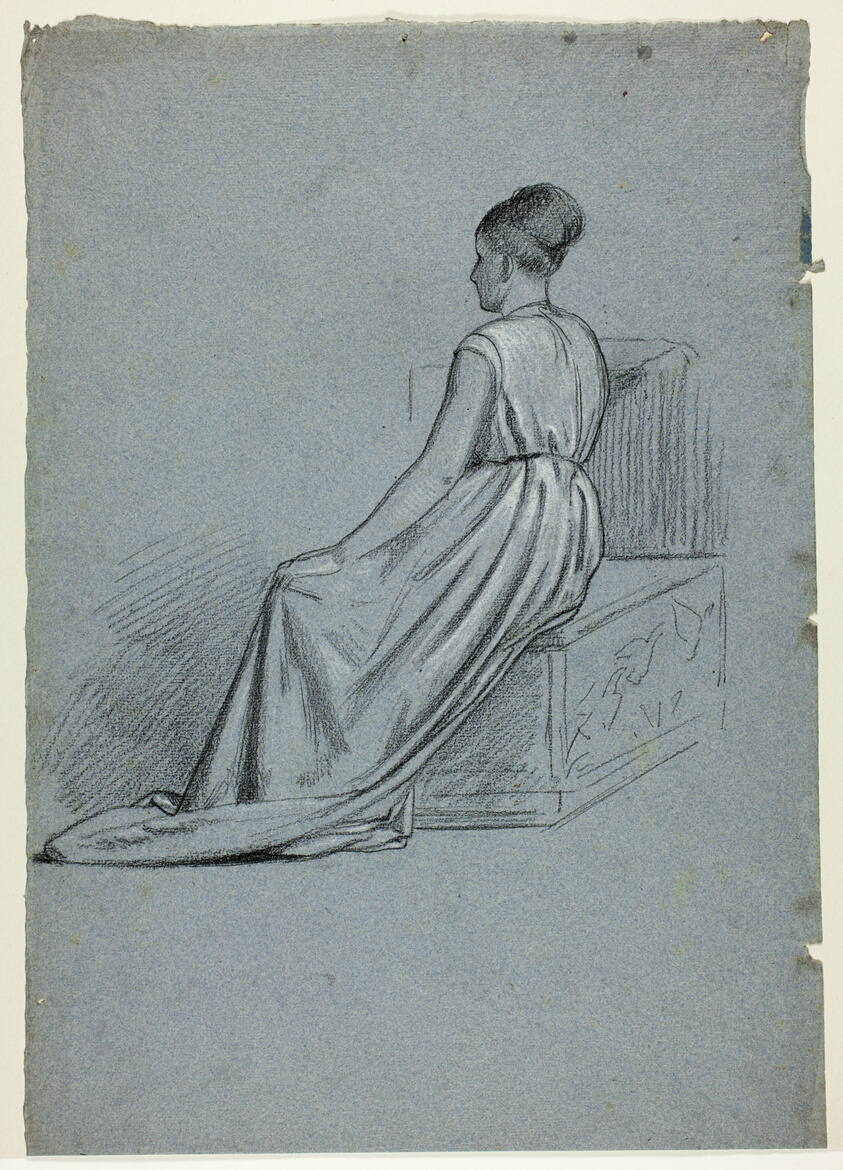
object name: Drawing and Watercolor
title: Woman Seated Looking to the Left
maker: Henry Stacy Marks (English, 1829-1898)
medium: Black pastel, heightened with white pastel, on blue laid paper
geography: England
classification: pastel; drawings (visual works); prints and drawing